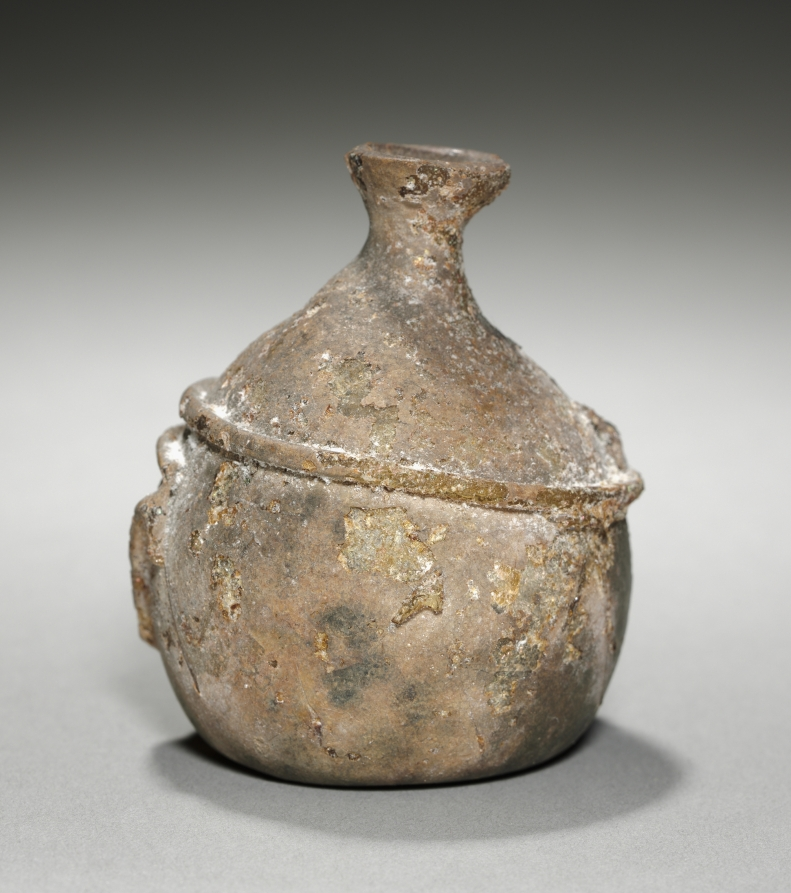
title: Vase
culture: Eastern Mediterranean, Roman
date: c. 200–500 CE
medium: glass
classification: Glass